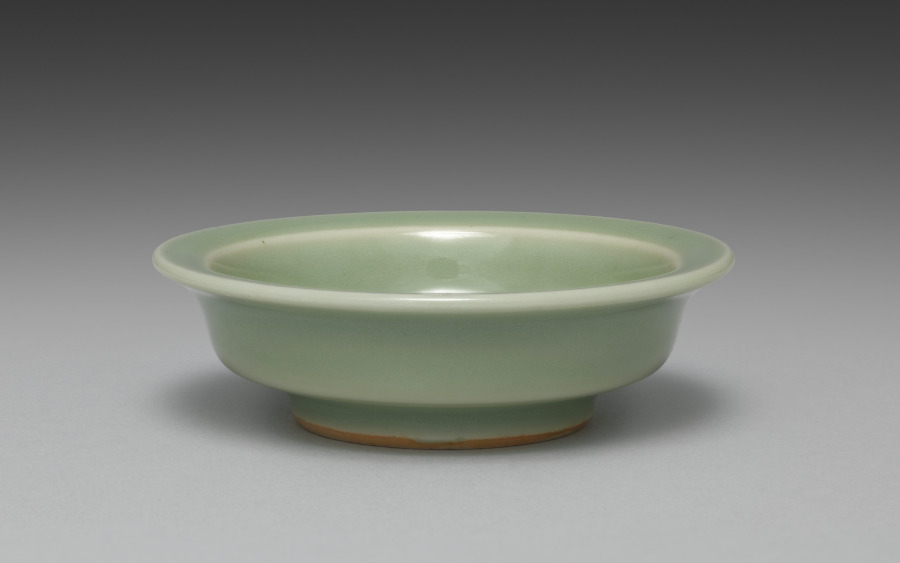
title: Saucer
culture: Japan, Meiji period (1868–1912)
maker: Seifū Yohei III (Japanese, 1851–1914)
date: 1893–1914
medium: One from a set of ten dishes; porcelain with green glaze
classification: Ceramic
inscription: 清風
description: Yohei III’s main output for his sophisticated clientele was in the form of tea sets and dining sets. He created a range of dishes in green glazes. He often produced in pairs, sets of five, or sets of ten. For this set of ten small dishes in a simple, round form that emphasizes the glaze above all, the box lid designates the piece as seiji, or green-glazed porcelain, using a general term for the extensive palette of green glazes often called celadon in English. The box lid further identifies the dishes themselves as tōchō, literally “bean-sized saucers,” a size that makes them suitable for dipping sauces.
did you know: The ten dishes in this set are stored in stacks of five in a two-compartment box.